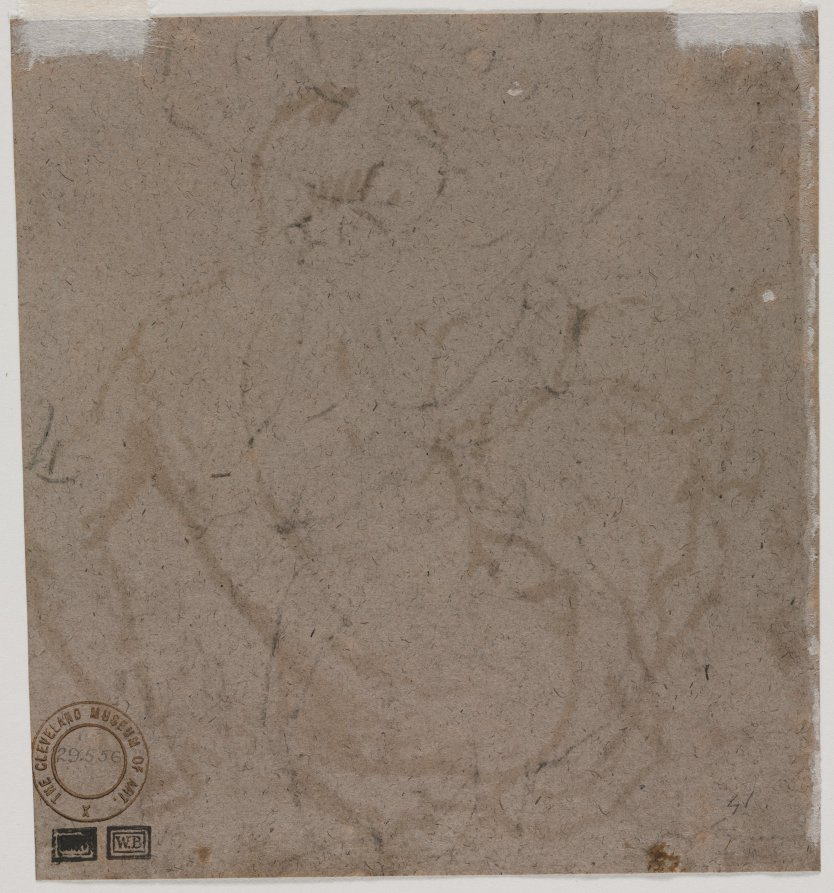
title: Sketch (verso)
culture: Italy, 16th century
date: 1500s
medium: brush and black wash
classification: Drawing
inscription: lower right, in graphite: 41